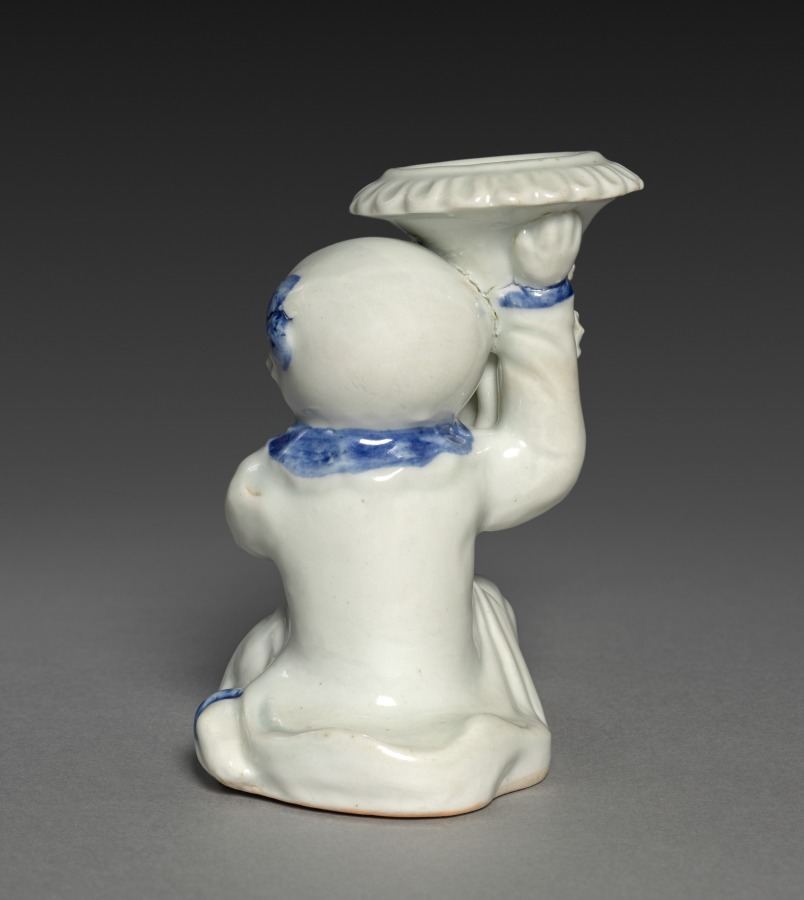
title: Kneeling Boy Holding a Vase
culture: Japan, Edo period (1615–1868)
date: 1700s-1800s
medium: porcelain, molded and carved, with underglaze blue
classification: Ceramic